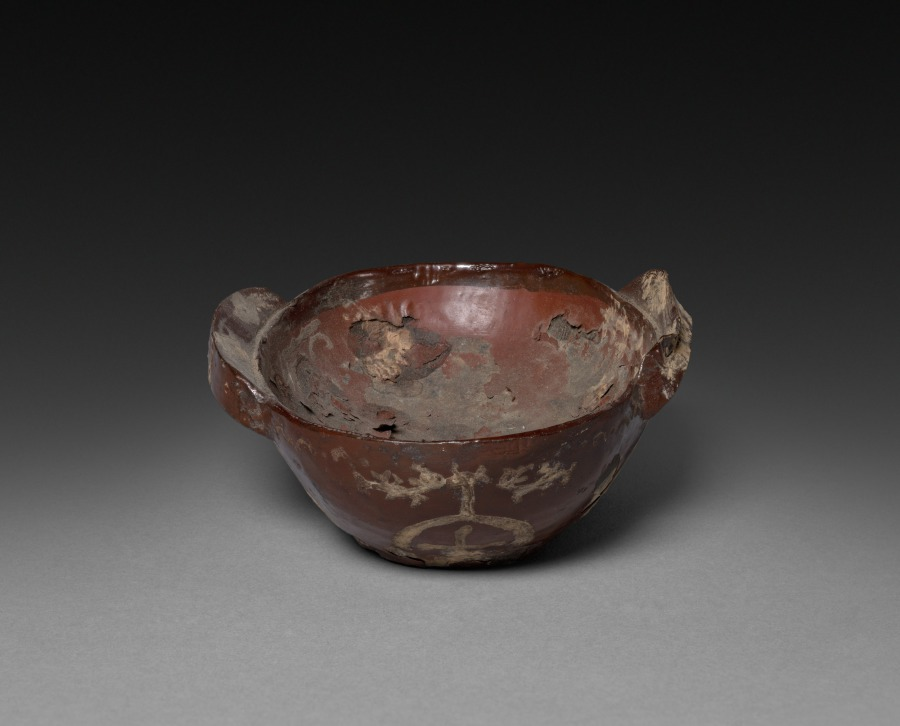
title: Cup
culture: China, Zhou dynasty (c. 1046–256 BCE)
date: c. 600–221 BCE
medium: lacquer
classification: Lacquer